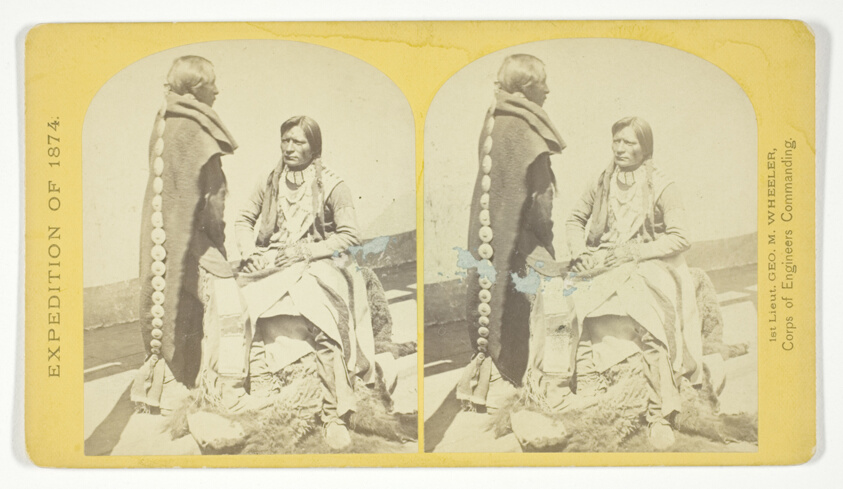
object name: Photograph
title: Ute Braves, of the Kah-poh-teh band, Northern New Mexico, in "full dress", No. 40 from the series "Geographical Explorations and Surveys West of the 100th Meridian"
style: 19th century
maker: Timothy O'Sullivan (American, born Ireland, 1840–1882); commissioned by George Wheeler for the War Department, Corps of Engineers, U.S. Army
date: 1874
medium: Albumen print, stereo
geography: United States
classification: stereograph (albumen); photography; photograph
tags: Collected by Hugh Edwards, Geographical Explorations and Surveys